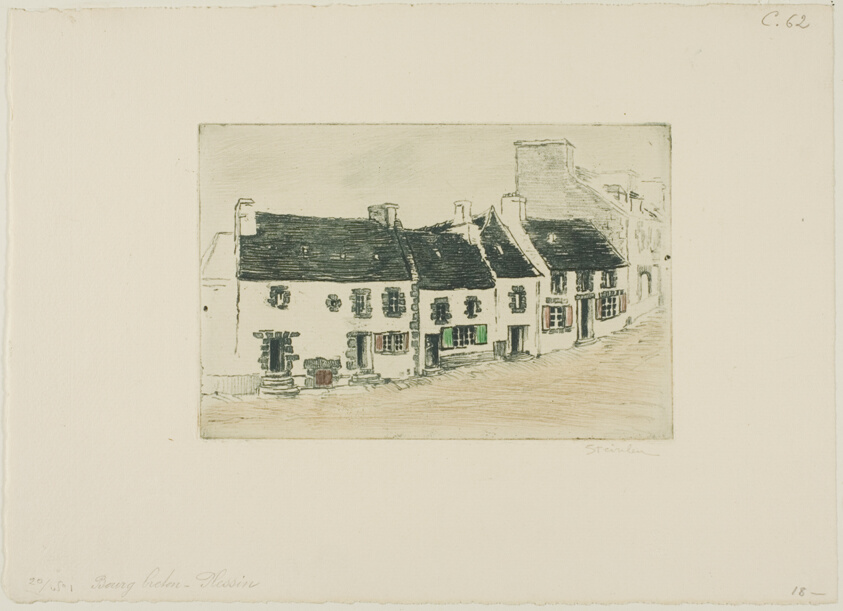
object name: Print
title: Breton Market Town, Plestin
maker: Théophile-Alexandre Steinlen; French, born Switzerland, 1859-1923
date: 1902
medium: Soft ground etching and drypoint from two plates printed in 4 colors (dark green, brown, pink and bright green) on ivory laid paper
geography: France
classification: etching; print; prints and drawing